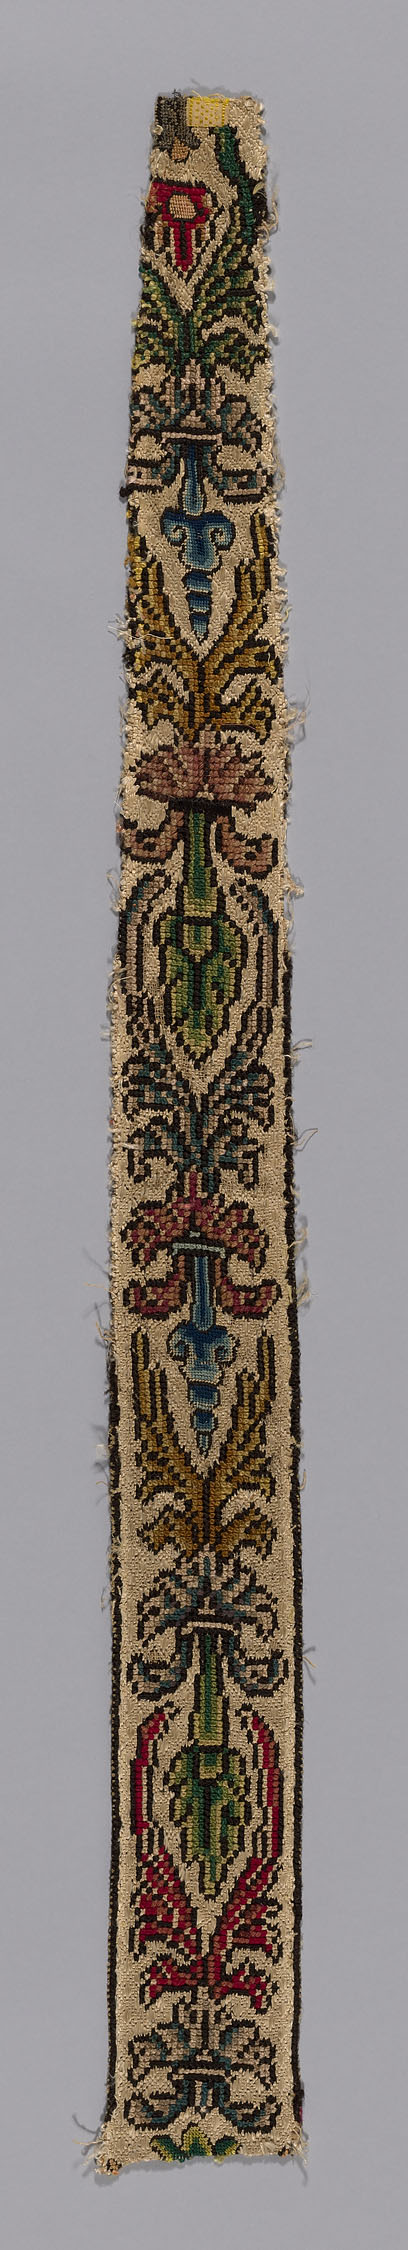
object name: Textile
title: Bell Pull (Fragment)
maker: France, Paris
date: 19th century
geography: Paris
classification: textile; needlework (visual works)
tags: Paris